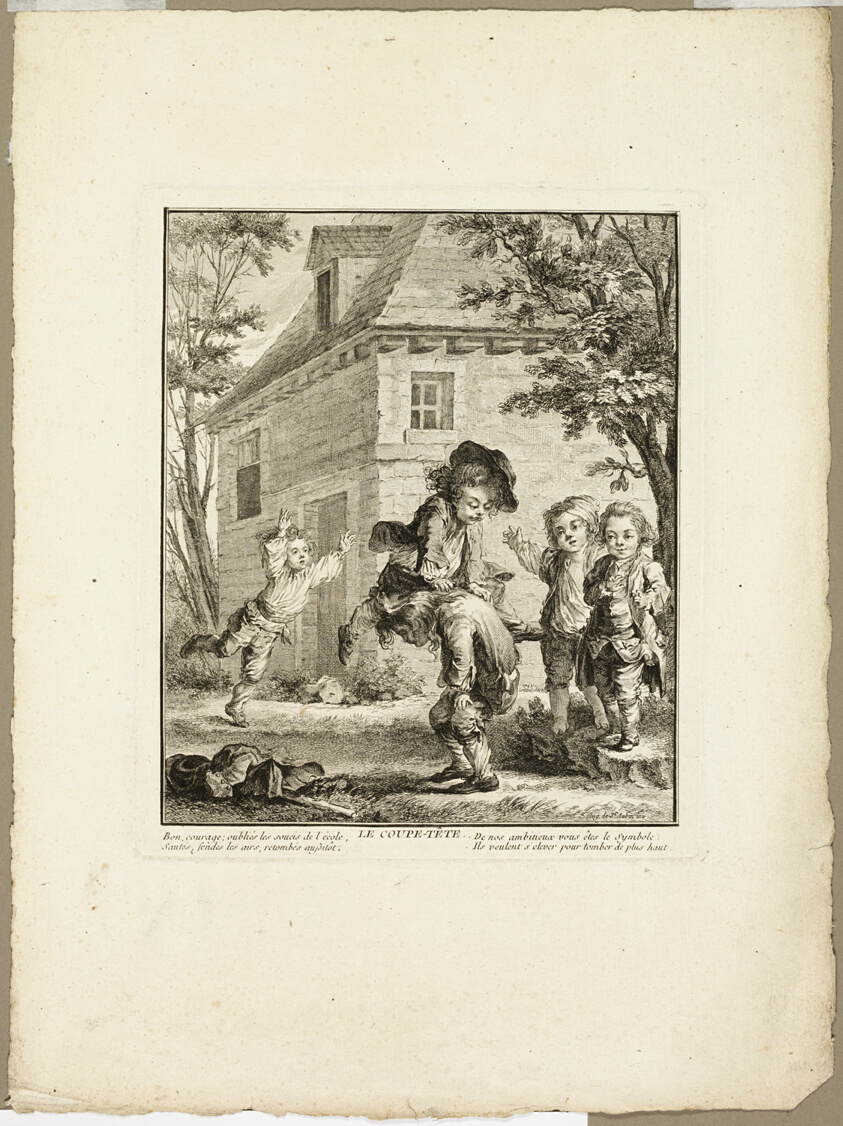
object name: Print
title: Leap Frog, from The Games of the Urchins of Paris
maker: Jean-Baptiste Tilliard (French, 1740–1813); after Augustin de Saint-Aubin (French, 1736-1807)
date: 1770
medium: Etching on ivory laid paper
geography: France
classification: etching; print; prints and drawing